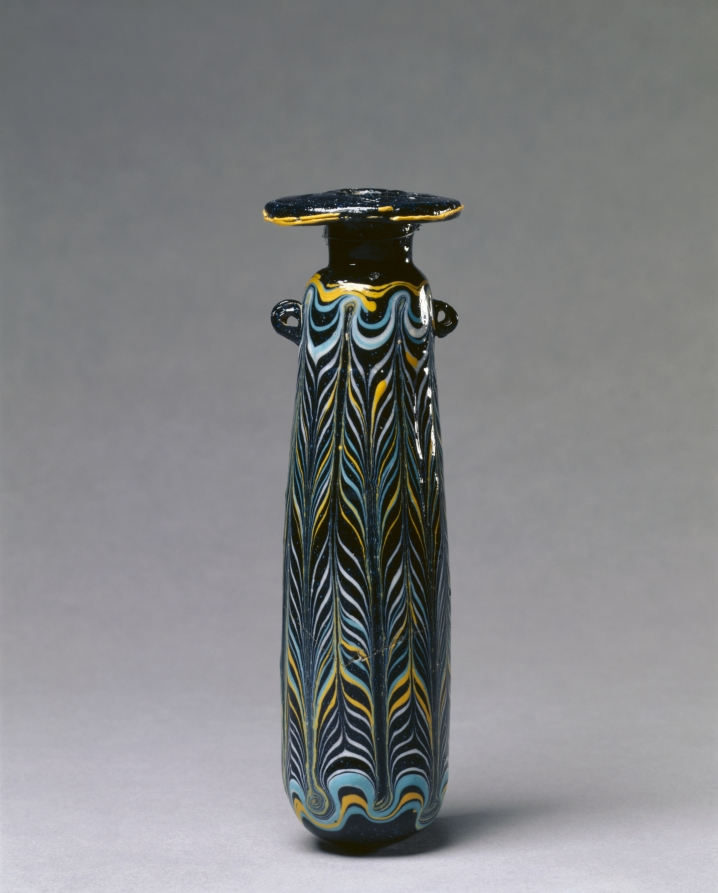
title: Perfume Bottle (Alabastron)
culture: Italy or Eastern Mediterranean, Etruscan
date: c. 325–275 BCE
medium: glass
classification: Glass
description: Before glassblowing was invented in about 50 BC, glass bottles were formed by winding molten glass around a mud or dung core much the way cotton candy is wrapped around a paper cone. Later, the core was scraped out leaving a hollow bottle to be filled with expensive perfumes or scented oils.